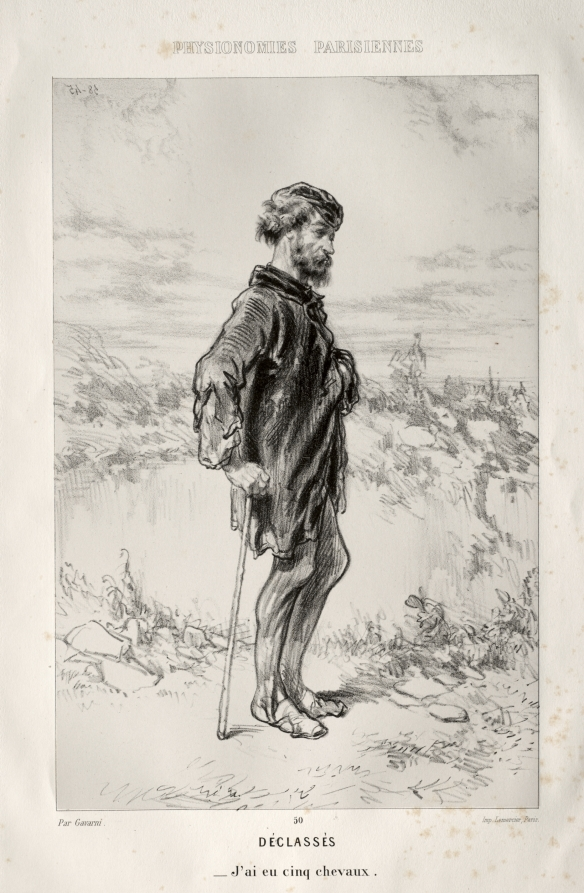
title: Déclassés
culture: France, 19th century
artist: Paul Gavarni (French, 1804–1866)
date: c. 1858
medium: lithograph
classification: Print